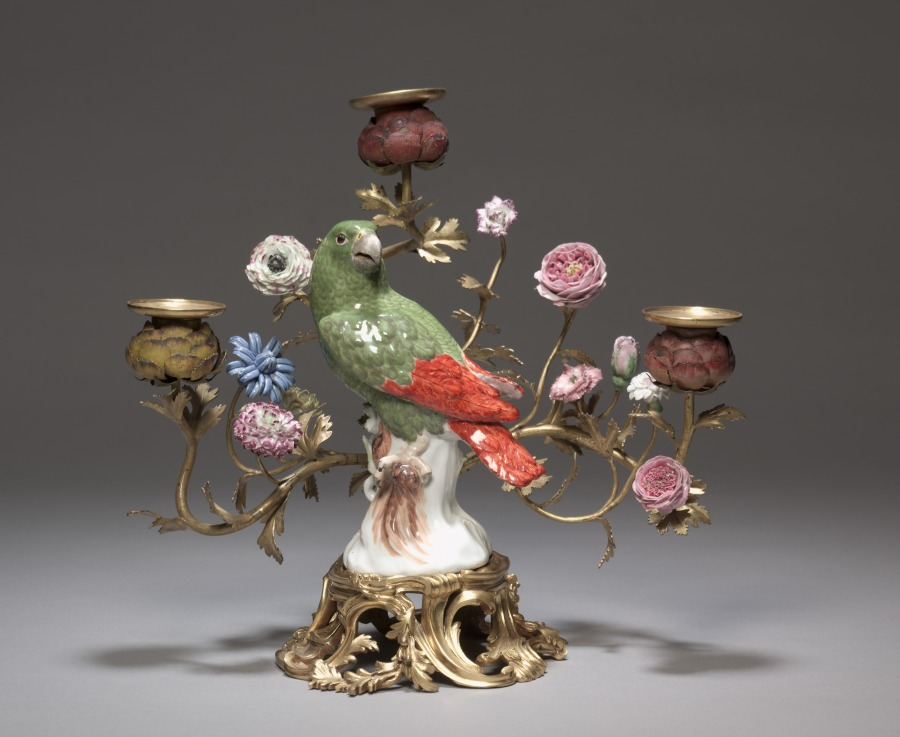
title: Candelabrum with Parrot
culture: Germany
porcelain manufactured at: Meissen Porcelain Factory (German, est. c. 1710)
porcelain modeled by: Johann Joachim Kändler (German, 1706–1768)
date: c. 1740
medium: porcelain mounted in gilt bronze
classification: Ceramic